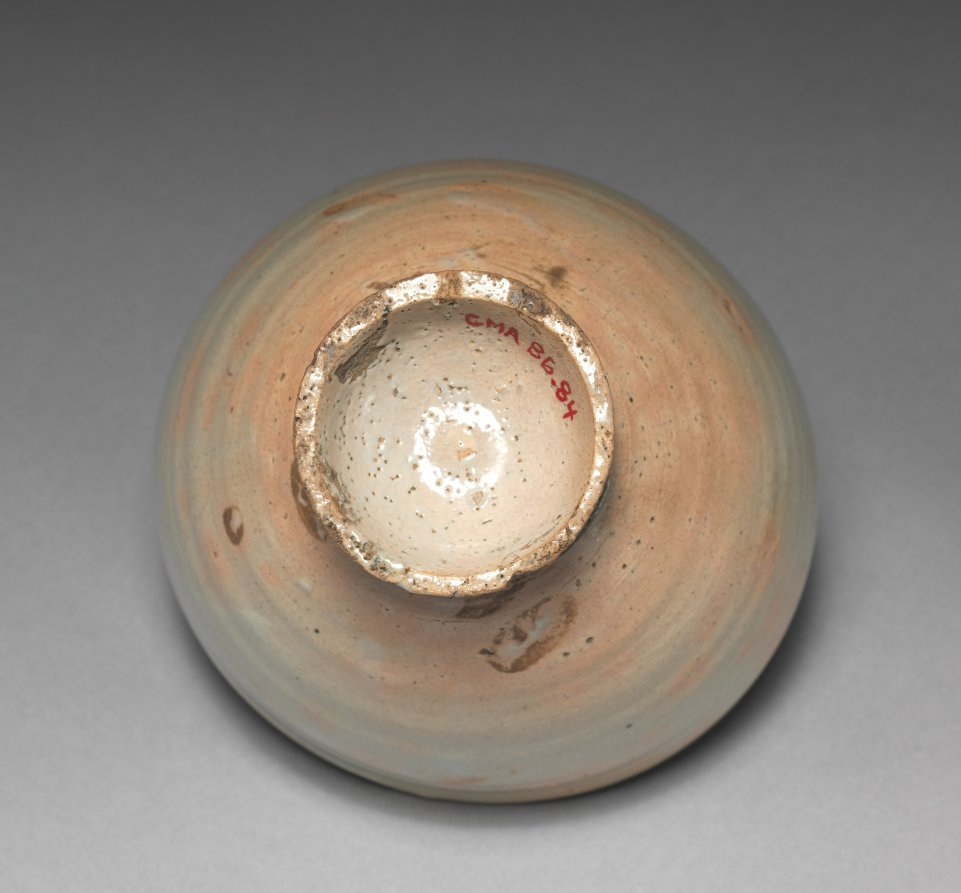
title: Tea bowl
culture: Korea, Joseon dynasty (1392–1910)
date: 1700s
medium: glazed stoneware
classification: Ceramic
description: Possibly produced in one of the kilns established by the trading office (Waegwan) in Busan, southern Gyeongsang province, this type of bowl with an elongated foot was exported to Japan and circulated as an item of foreign luxury among Japanese tea ware collectors. Pinholes in the light pinkish glaze were intended to resemble "fawn spots."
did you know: Pinholes in the light pinkish glaze were intended to resemble "fawn spots."